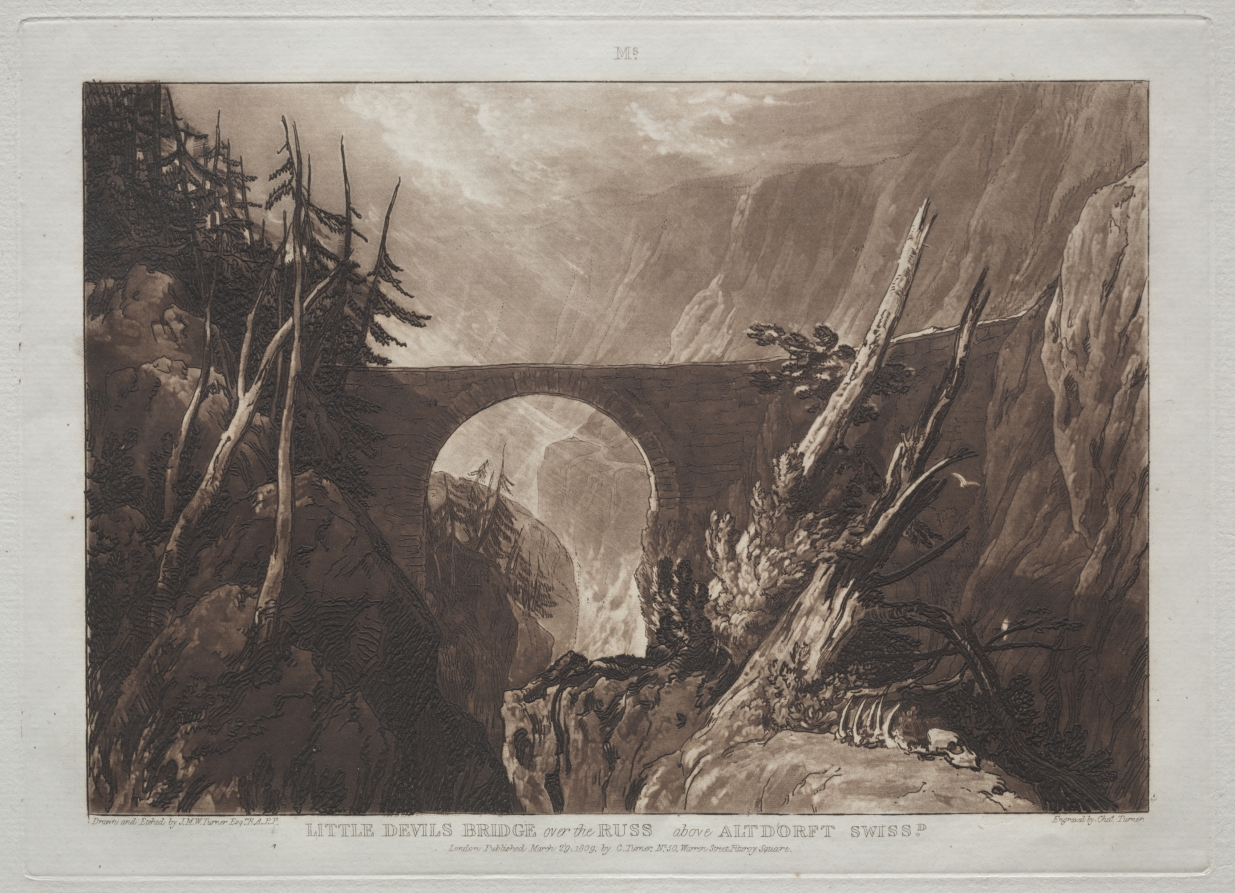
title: Liber Studiorum: Little Devil's Bridge over the Russ, above Altdorft, Swiss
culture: England, 19th century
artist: Joseph Mallord William Turner (British, 1775–1851)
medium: etching and mezzotint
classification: Print